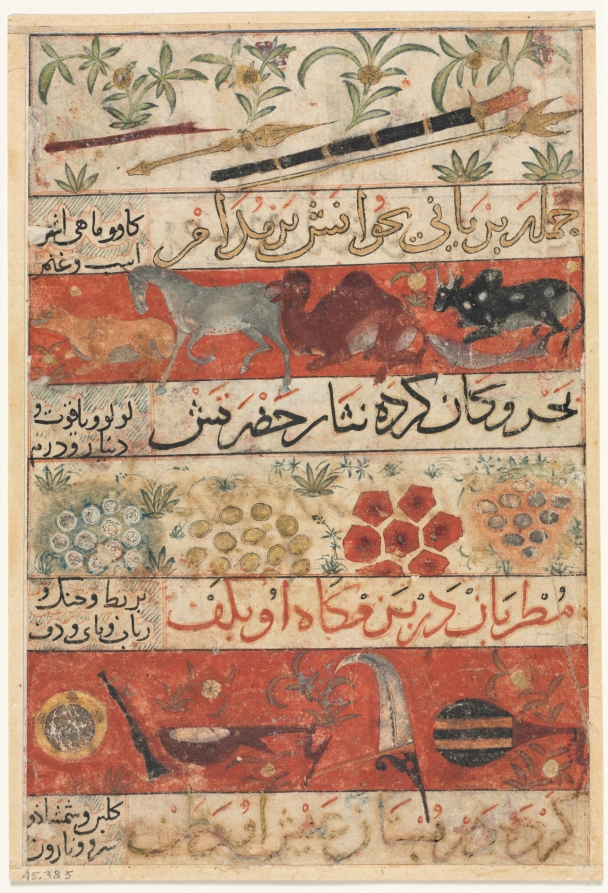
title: Animals, Precious Stones, Coins, and Musical Instruments (recto) from a Mu'nis al-Ahrar fi Daqa'iq al-Ash'ar (The Free Men's Companion to the Subtleties of Poems) of Muhammad Ibn Badr al-Din Jajarmi (active 1340s)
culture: Iran, Shiraz, Ilkhanid period (1256-1353)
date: c. 1341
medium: opaque watercolor, ink, and gold on paper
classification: Manuscript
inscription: Script: Thulth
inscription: (text on the previous page, leaf 2f, Harvard University Art Museums, 1960.186) In the hands of his slaves and of his friends are:/ Spear and sword, javelin and pen./ Ever all roasted at his table are:/ Ox and fish, camel and horse and sheep./ Ocean and mine have showered on his presence:/ Pearl and ruby, coined gold and silver/ The minstrels at his banquet bear in their hands:/ Lute and harp, rebec, pipe and tambourine.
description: This is one of several pages that were removed from a unique manuscript of this otherwise unknown work, which bears a colophon stating that it was written by the author and finished "Ramadan, 741" (February 1341). Illustrations on both sides include various animals, trees, and objects such as weapons, musical instruments, and jewels.